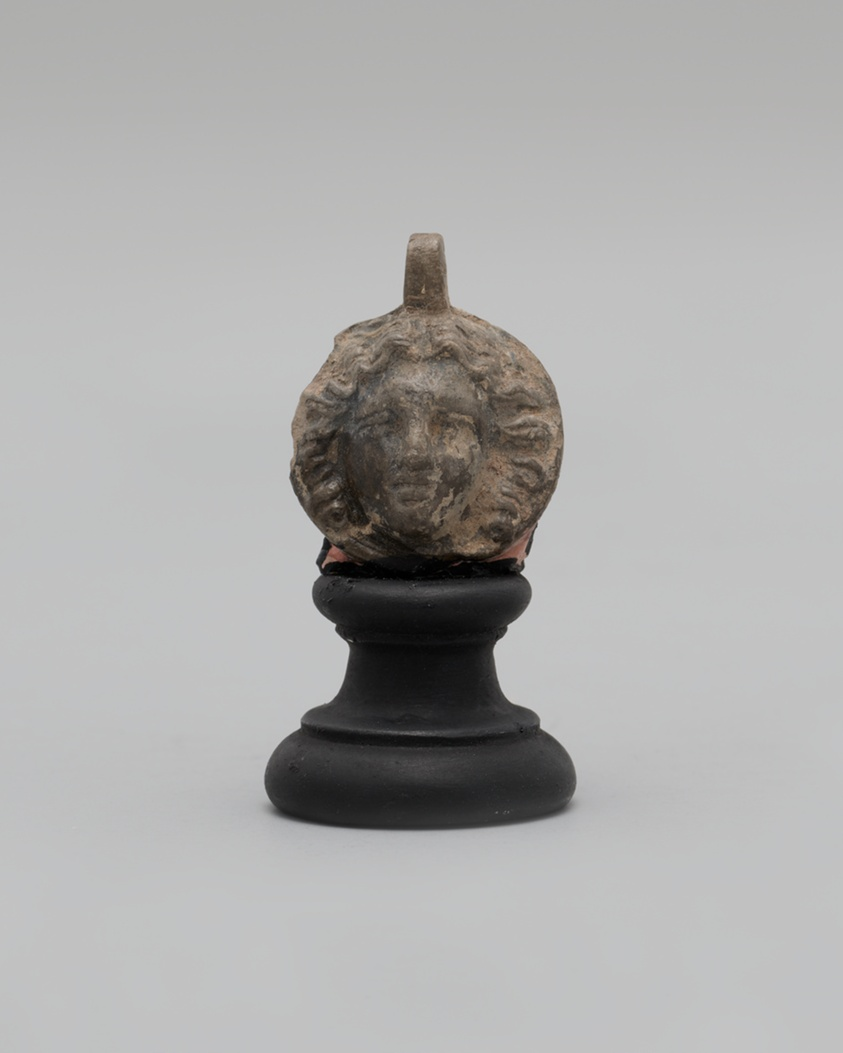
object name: Sculpture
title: Pendant Depicting Apollo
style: greek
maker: Greek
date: 2nd-1st century BCE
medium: terracotta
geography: Greece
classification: earthenware; ceramics; sculpture; ancient art